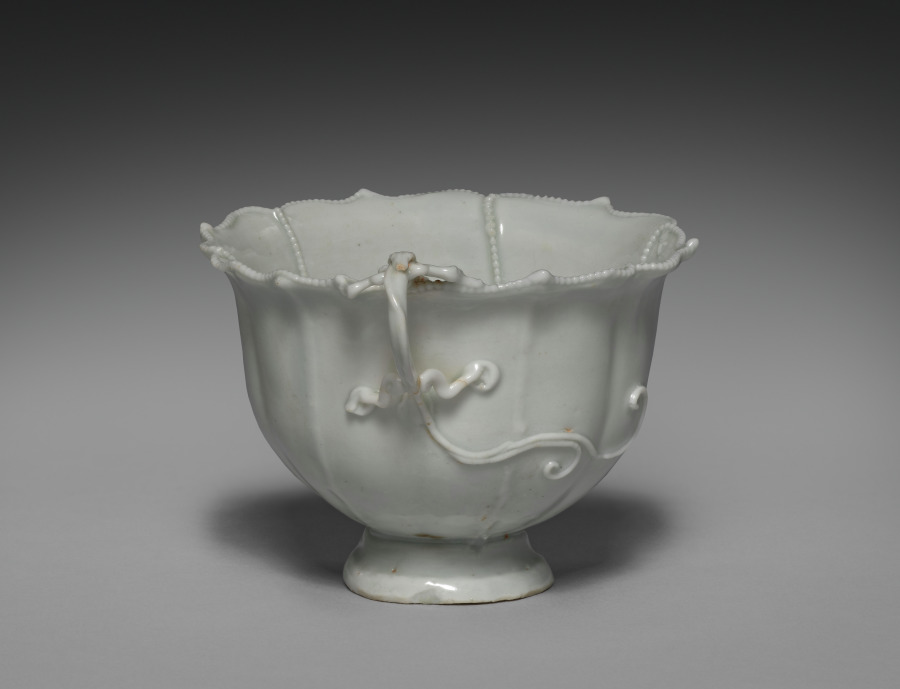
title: Fluted Cup with Dragon Handle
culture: China, Jiangxi Province, Jingdezhen kilns, Yuan dynasty (1271–1368)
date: early 1300s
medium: Glazed porcelain, Qingbai (bluish-white) ware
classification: Ceramic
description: Very thinly potted, the subtly lobed body of this cup is almost translucent. The thin, slightly opaque, light greenish glaze lends a sugary shine. Applied elements, including the handle, beaded borders, and sculptural floret, are constructed and glazed with the same materials as the body, providing a seamless blend of form and decorative embellishment. The result is an evocative reminder of slightly earlier silver cups, also created in the form of flowers. This pristine, natural construction is challenged, however, by the archaic dragon that acts as the handle. Borrowed from the decoration found on much earlier bronzes, this added form illustrates the eclecticism of the Yuan, the attempt to blend present vision with interest in the past.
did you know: Clay beading divides the cup's interior into six foliate panels with a six-petaled flower at the junction of the beaded lines.